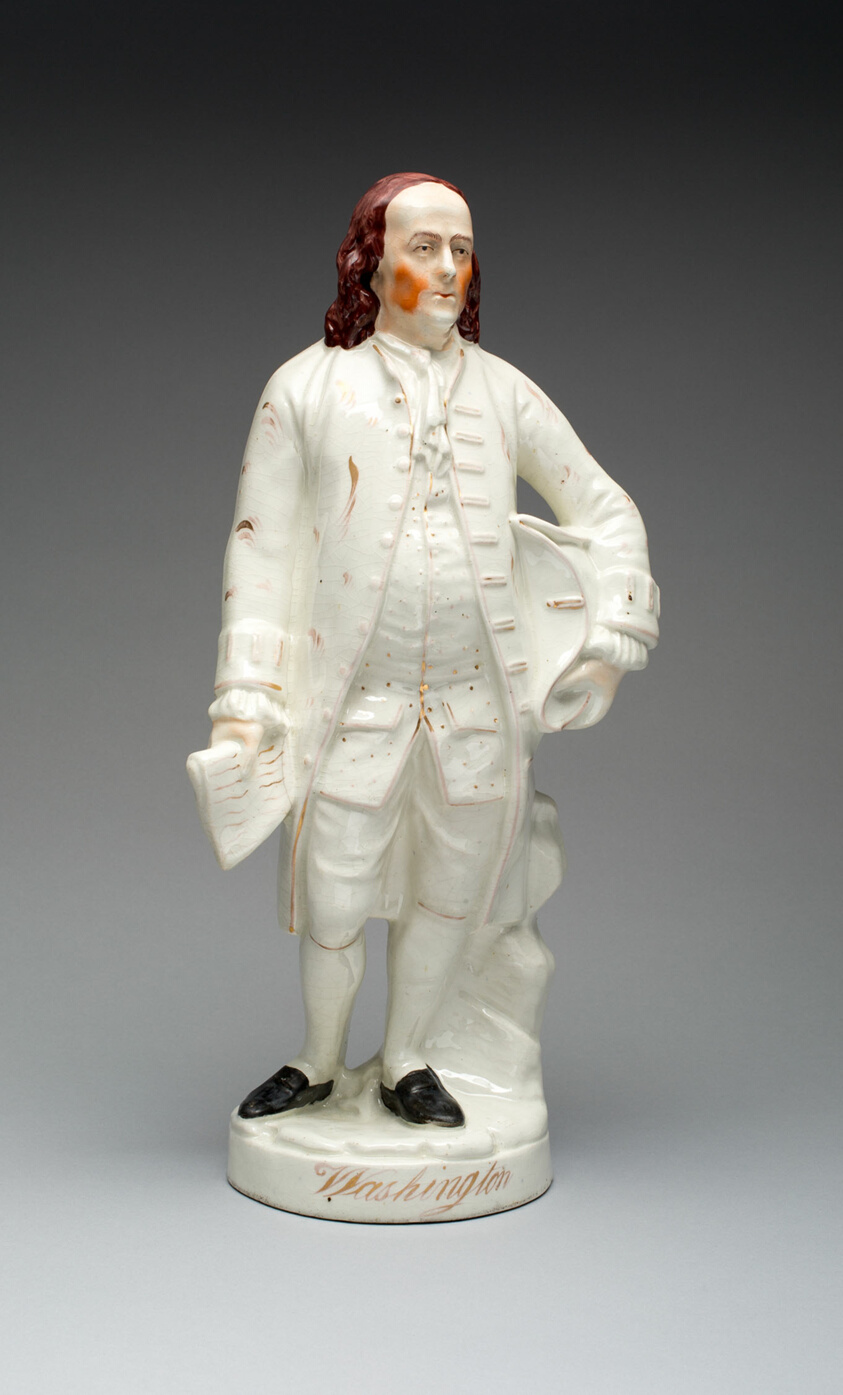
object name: Decorative Arts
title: Statue of Benjamin Franklin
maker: English for the American market; Staffordshire, England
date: 1800–80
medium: Earthenware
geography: Staffordshire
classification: porcelain; american decorative arts; ceramics; decorative arts